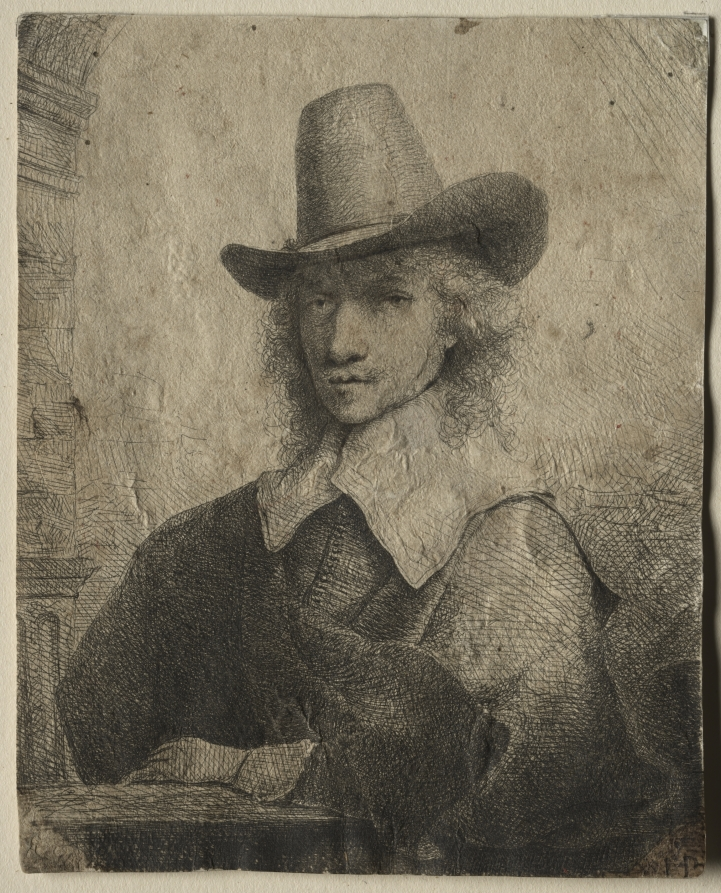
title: Portrait of a Man with a High Hat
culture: Netherlands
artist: Ferdinand Bol (Dutch, 1616–1680)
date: 1642/1651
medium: etching and drypoint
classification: Print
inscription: VERSO, upper center, in graphite: [u?]ally by Ferdinand Bol ; center, in brown ink: Dr. Daulby, p: 302. No.A./ / Gersaint._181._3. ; lower right, in brown ink: [M?] W.